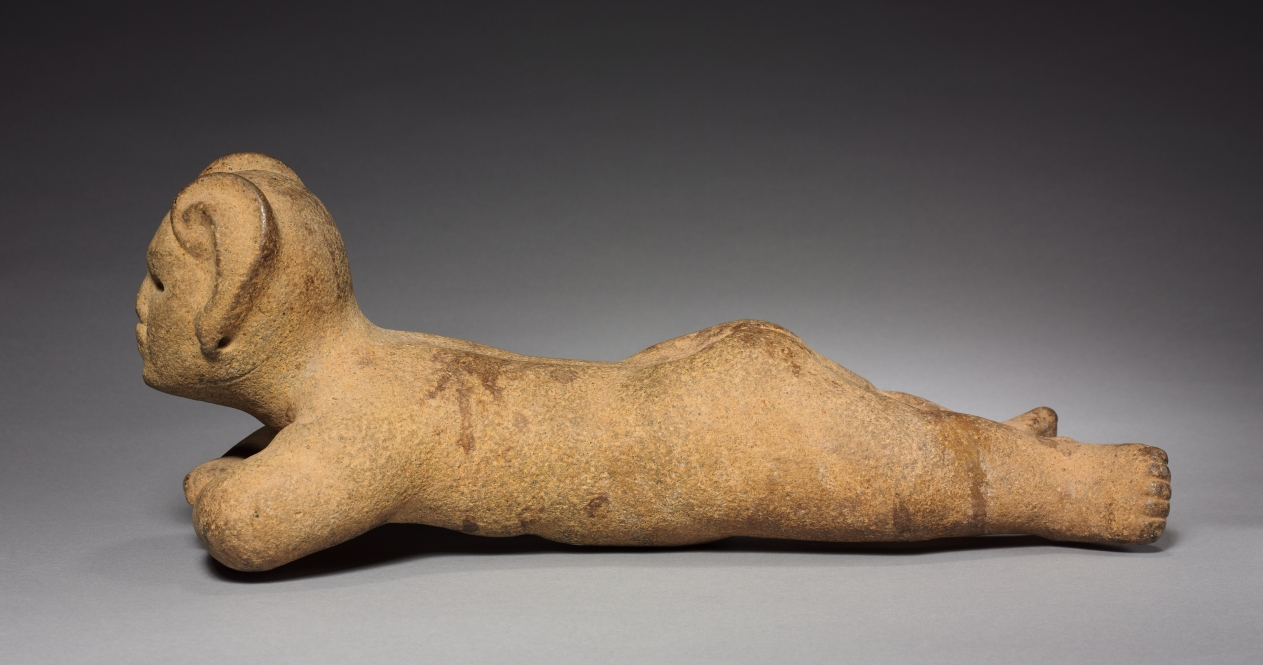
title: Reclining Figure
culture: Mexico, Gulf Coast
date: 300–600 CE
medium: stone, pigment traces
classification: Sculpture